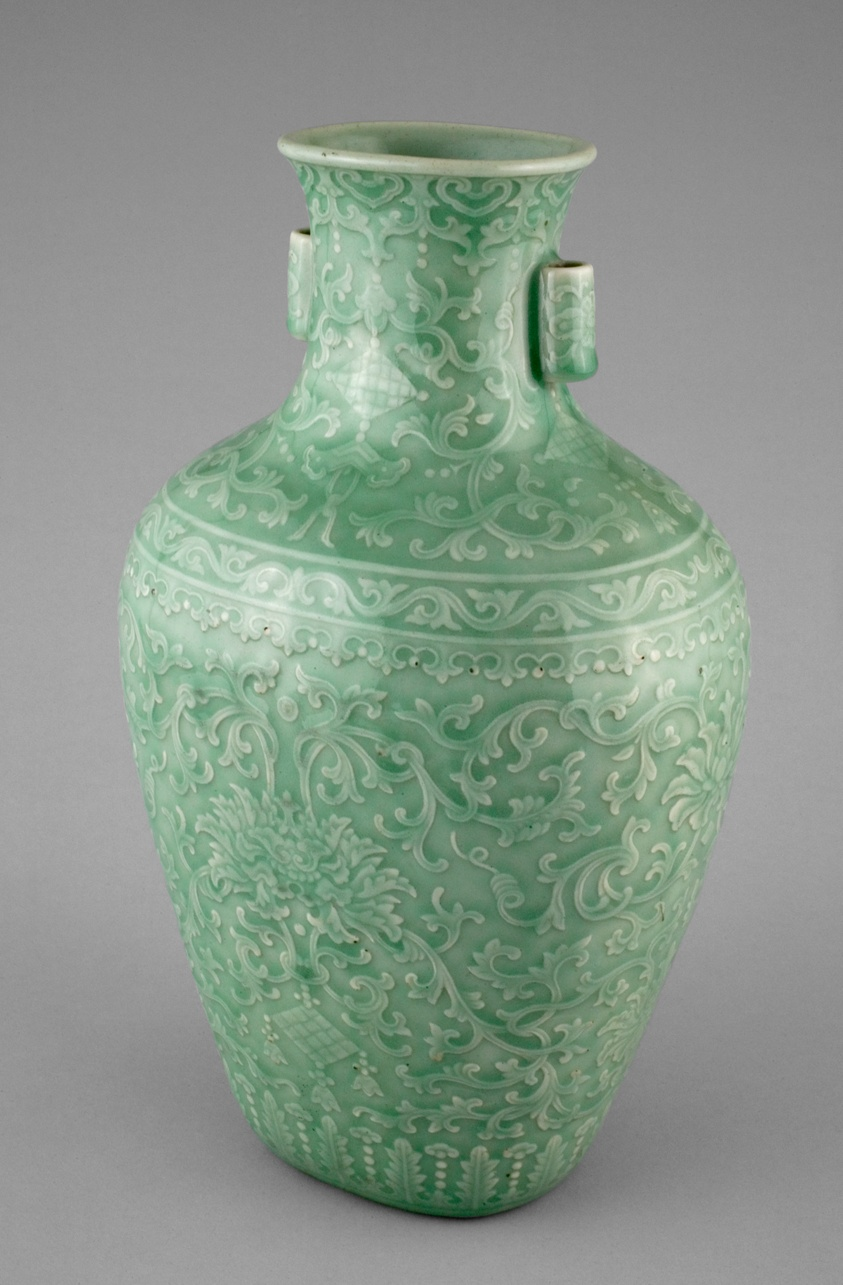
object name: Vessel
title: Jar with Tubular Handles, Peonies, “Endless Knot,” Pendant Balls, and Pendant Lozenges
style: Chinese (culture or style)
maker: China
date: Qing dynasty (1644–1911), Qianlong reign mark and period (1736–1795)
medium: Porcelain with underglaze molded decoration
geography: China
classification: vase; porcelain; vessel; asian art; ceramics